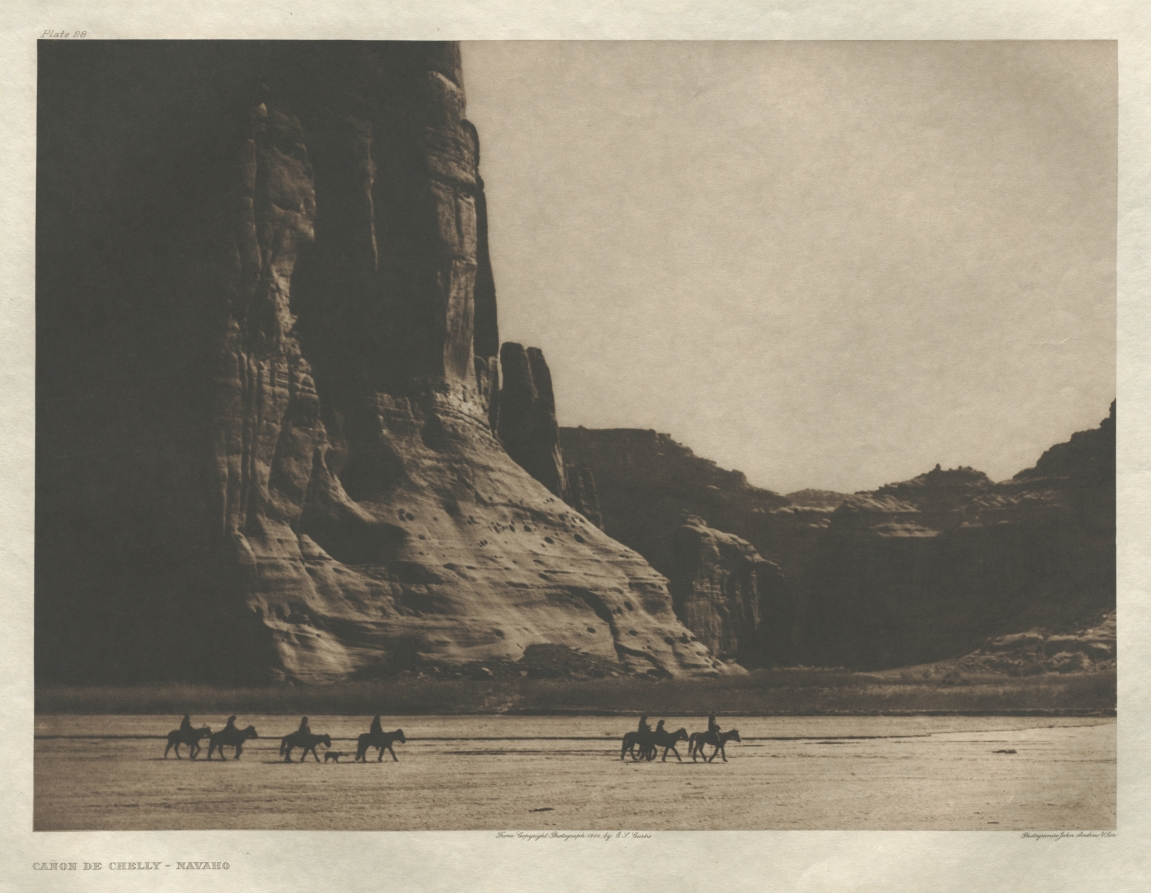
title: Portfolio I, Plate 28: Cañon de Chelly-Navaho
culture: America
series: The North American Indian: being a series of Portfolios picturing and describing the Indians of the United States, the Dominion of Canada, and Alaska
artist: Edward S. Curtis (American, 1868–1952)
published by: The University Press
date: 1904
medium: photogravure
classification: Portfolio